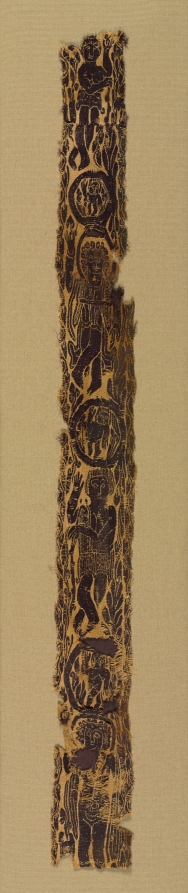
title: Ornamental Shoulder Band from a Tunic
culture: Egypt, Byzantine period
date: 600–650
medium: tapestry weave with supplementary weft wrapping; undyed linen and dyed wool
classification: Textile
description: On this tunic decoration, human figures appear to dance amid leafy plants. The first and third figures are shepherds, each wearing spotted animal–skin garments and holding wooden staffs. The second and fourth figures are dancers; the upper one wears a short draped garment (peplos), and the lower one appears nude except for a scarf draped over her shoulders. The brown-purple wool was dyed with kermes, a bluish-red dye from dried insects, and indigo in an unsuccessful attempt to imitate purple.